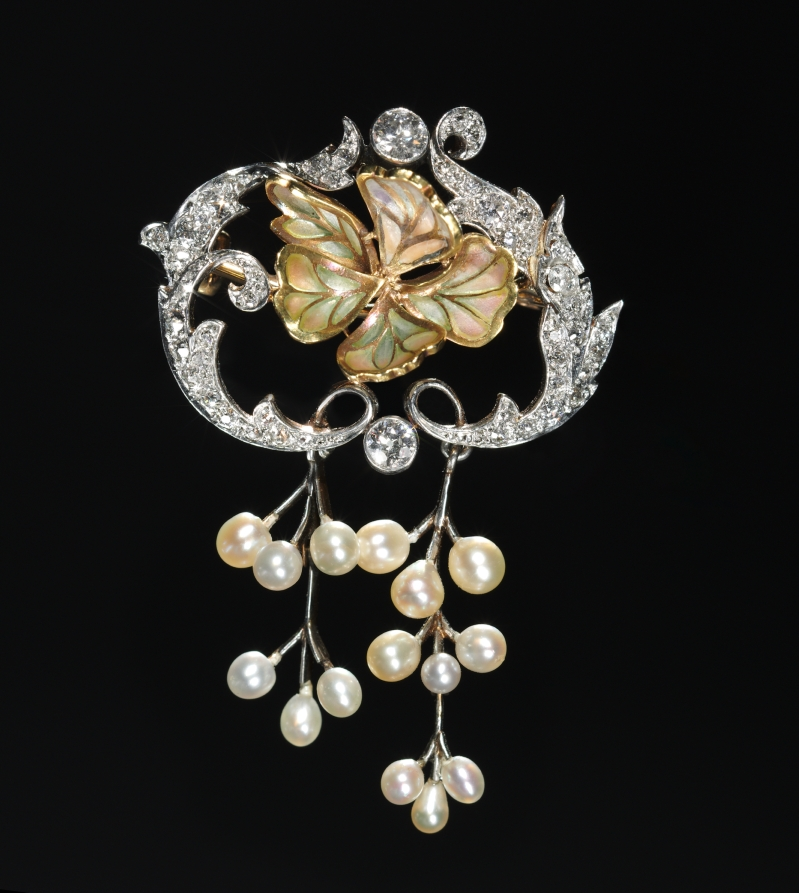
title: Brooch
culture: America, New Jersey, Newark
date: c. 1890–1910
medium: pearls, diamonds, enamel, gold, platinum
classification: Jewelry